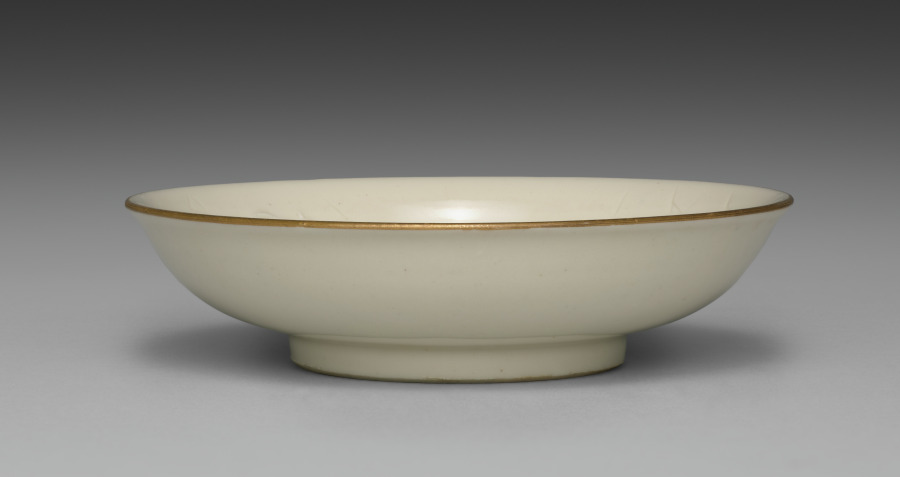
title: Small Dish from Dining Set with Plum Blossoms and Cracked-Ice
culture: Japan, Meiji period (1868–1912)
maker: Seifū Yohei II (Japanese, 1844–1878)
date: c. 1875–78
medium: Porcelain with molded designs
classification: Ceramic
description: Each item in this set has a delicate low-relief design of flowering plum branches over scattered, intersecting lines meant to resemble the cracked-ice surface of a frozen body of water and is signed on the base in gold pigment. While Yohei II produced many fine works in underglaze blue, like those produced by Kiyomizu Shichibei, he also made works in quite different styles later in his career, from the early 1870 s. In 1873, he was appointed purveyor to the Industrial Center of Kyoto Prefecture, a designation associated with Kyoto’s efforts to reach an international market through the port of Kobe; and from 1875 until his death, he was involved in national-level projects to present Japanese ceramics across the world. It was during this period that Yohei III was apprenticed to Yohei II, and it has been suggested that this set may in fact be an early example of Yohei III’s work, which he signed with his teacher’s name. Decorated with flowers resembling Japanese textile motifs, the set calls to mind the design of Yohei II’s pair of vases with plum blossoms in the Victoria and Albert Museum. Here, the elaborate trees created for a formal public exhibition setting have been translated into the approachable blossoms of the genteel domestic environment. While the designs are consistent across the pieces, each raised flower petal and pistil and each incised line in the ice was done by hand, so the cups, bowls, and dishes are similar yet unique. The bottoms of two boxes once identified the set’s owner, but the information has been deliberately obscured with black ink. However, inscriptions still visible appear to indicate two occasions, once at the end of July 1886 , and once again in June 1916 , when parts of the set were requested from Hokura in Niigata Prefecture. The location corresponds to a neighborhood in the present-day city of Jōetsu. The surname Tsuji 辻 also appears on a paper tag affixed to one of the box cloths. Future research may possibly reveal more about their provenance. A vase by Yohei III in a private collection combines the formal grandeur of the Yohei II vases in the Victoria and Albert Museum with the gentler design of this dining set, placing flowering plum trees against soft, scalloped-edge clouds resembling those in golden screens.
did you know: The dining wares have a creamy white coloration that the four boxes containing them identify as Korean in style.